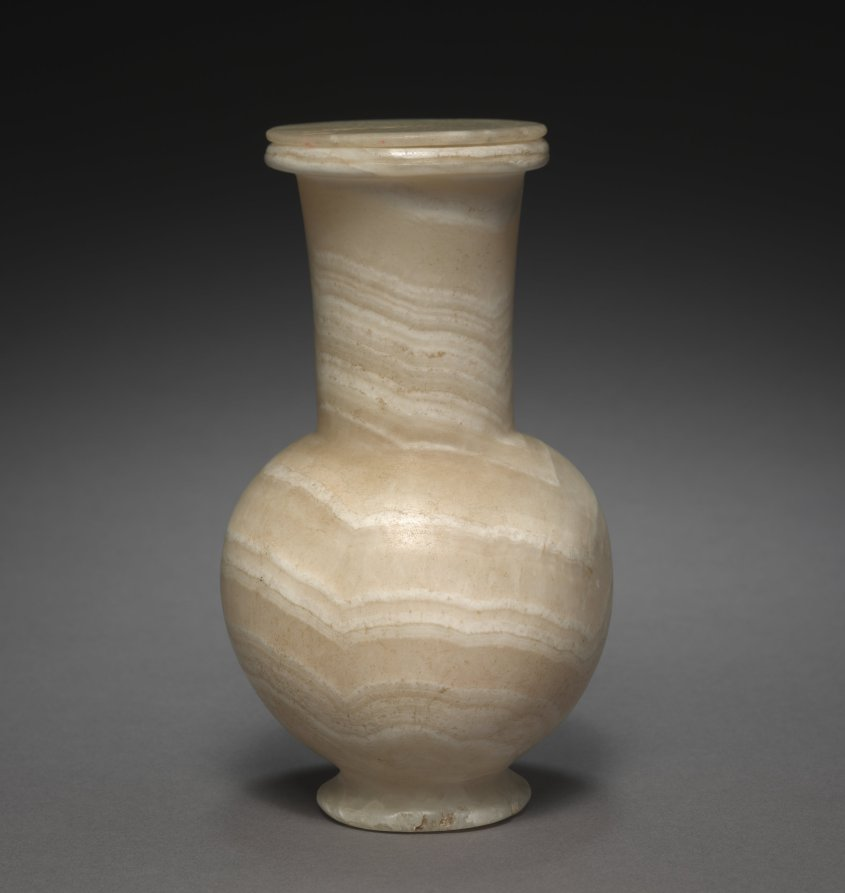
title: Long-Necked Flask with Lid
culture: Egypt, New Kingdom (1540–1069 BCE), Dynasty 18, reign of Tuthmosis III (1479–1425 BCE)–reign of Amenhotep III (1390–1352 BCE)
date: 1401–1353 BCE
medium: travertine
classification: Vessels